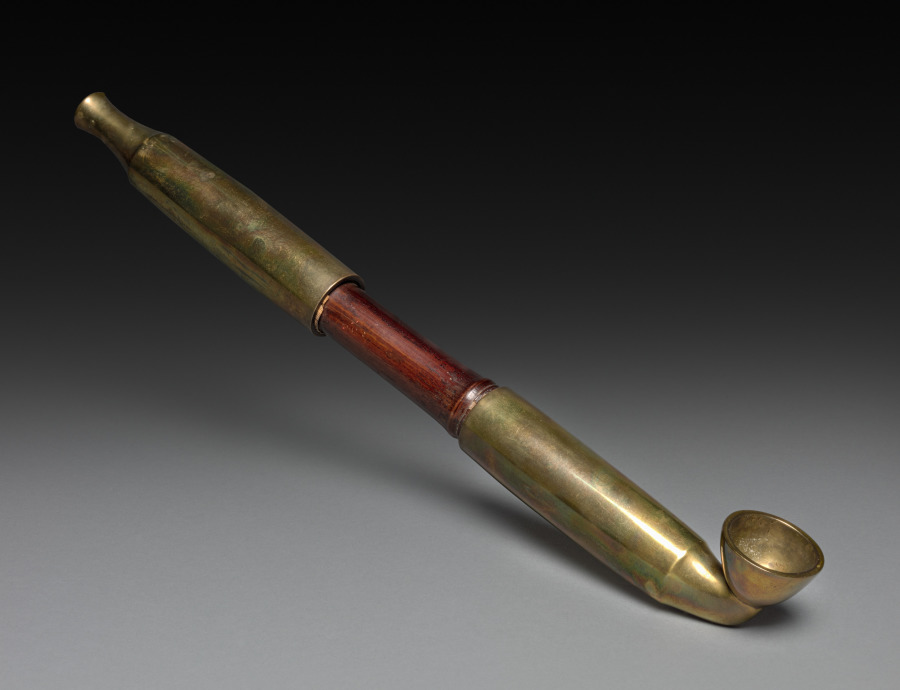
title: Tobacco Pipe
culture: Japan, Edo period (1615–1868)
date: early to mid-1800s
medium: bamboo and brass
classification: Miscellaneous